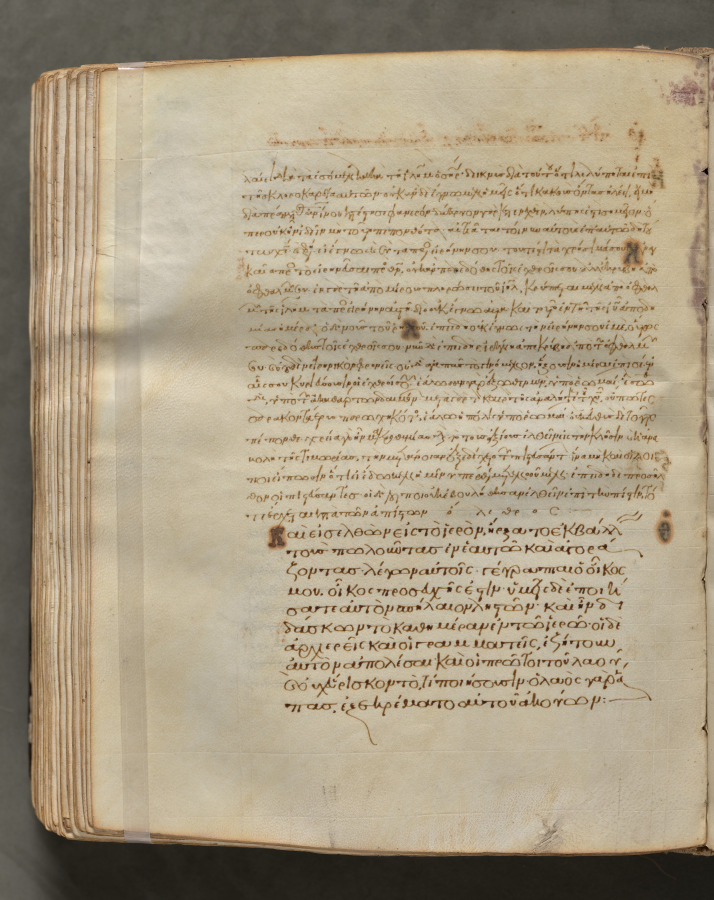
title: Text, folio 298 (verso), from a Gospel Book with Commentaries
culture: Byzantium, Constantinople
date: c. 1000–1100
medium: ink, tempera, and gold on vellum; leather binding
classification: Bound Volume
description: Each of the four gospels in this book opens on a page with brilliantly illuminated borders depicting the author of the text as well as birds—principally peacocks, symbols of the immortality of the soul—and fountains, representing the fountain of life and the salvation of the soul. This volume consists of 428 leaves with texts in Greek. Its level of sophistication suggests that it was probably written and decorated in a monastery in Constantinople.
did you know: Gospel books were carried in procession through Byzantine churches.